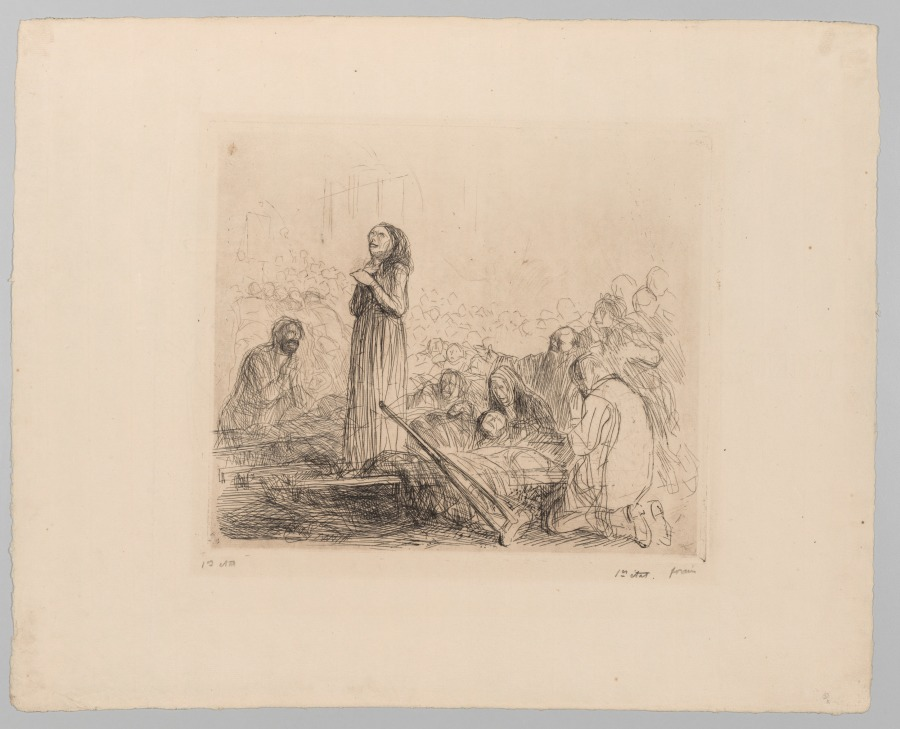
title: The Miracle before the Blessed Sacrament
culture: France, late 19th-early 20th century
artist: Jean Louis Forain (French, 1852–1931)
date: 1912–13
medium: etching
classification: Print